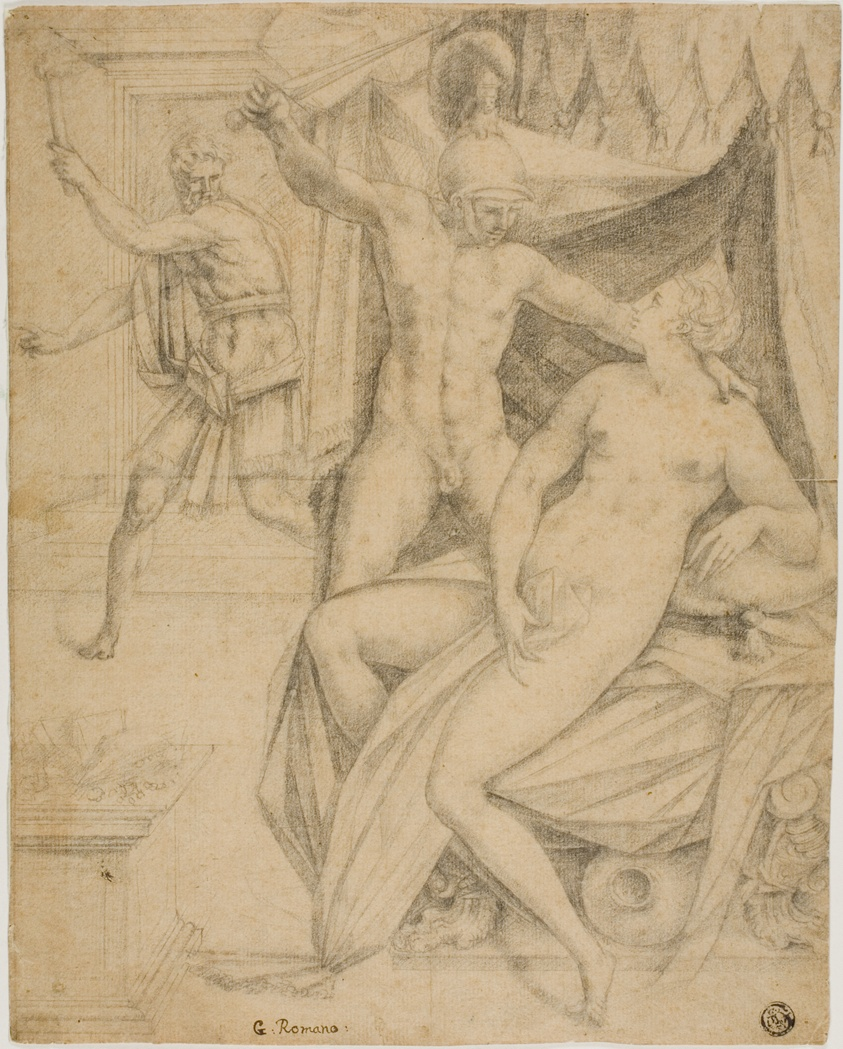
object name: Drawing and Watercolor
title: Tarquin and Lucretia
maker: School of Fontainebleau; French, flourished 1530s-1610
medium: Black chalk on tan laid paper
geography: France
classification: graphite; drawings (visual works); prints and drawing